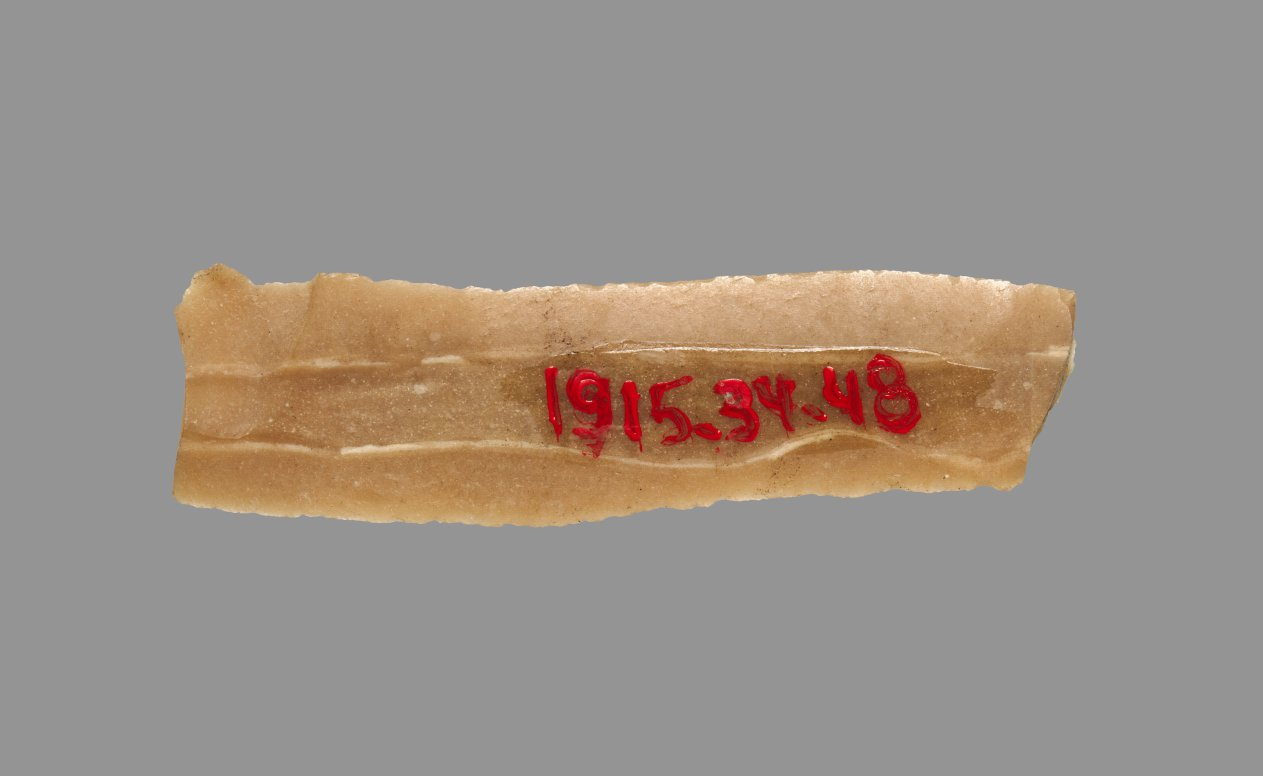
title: Sickle Blade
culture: Egypt, Middle Kingdom (2040–1648 BCE), Dynasty 12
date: 1980–1801 BCE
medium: flint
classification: Implements